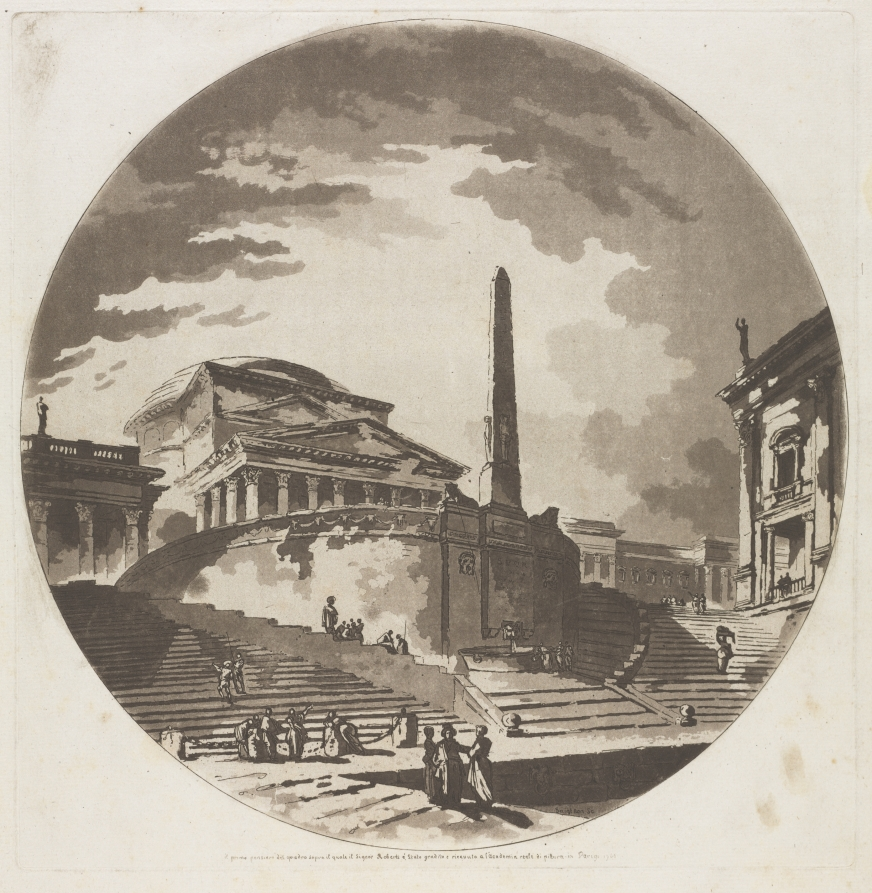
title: View of the Rotunda with Stairs on the Tiber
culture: France, 18th century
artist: Jean-Claude-Richard de Saint-Non (French, 1727–1791)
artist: after Hubert Robert (French, 1733–1808)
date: 1766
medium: aquatint and etching printed in brown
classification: Print